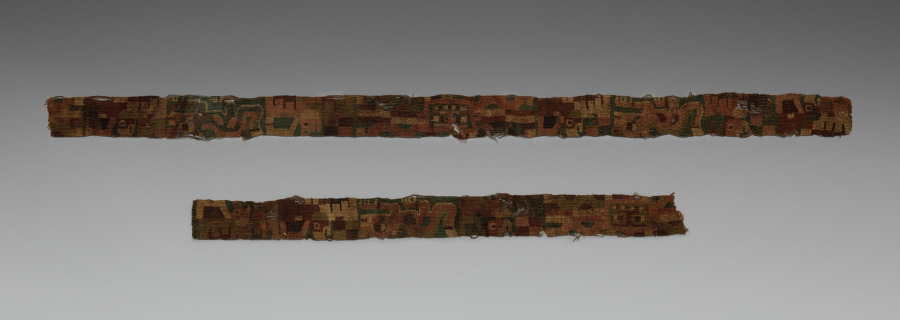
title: Fragments of a Belt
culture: Peru, South Andes, Tiwanaku style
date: c. 400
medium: camelid wool; tapestry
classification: Textile